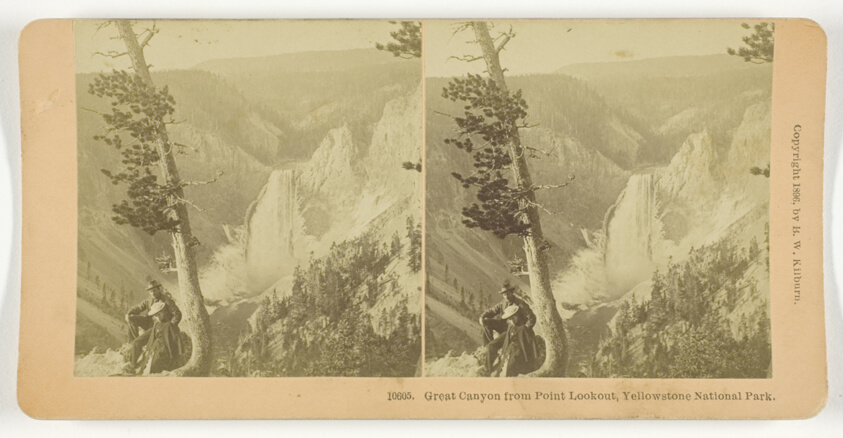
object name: Photograph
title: Great Canyon from Point Lookout, Yellowstone National Park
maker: B. W. Kilburn; American, 1827–1909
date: 1896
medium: Albumen silver print, stereo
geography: United States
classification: stereograph (albumen); albumen silver print; photographic process; photography; photograph